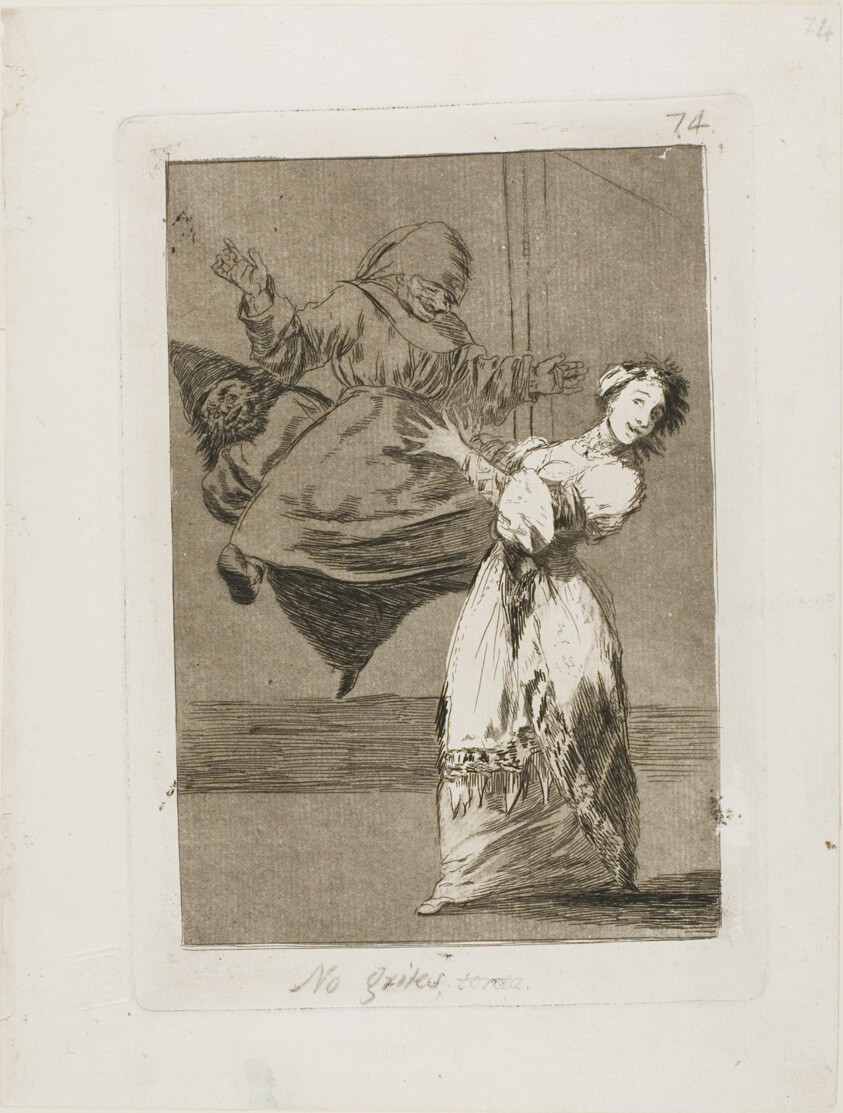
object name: Print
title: Don't scream, stupid, plate 74 from Los Caprichos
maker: Francisco José de Goya y Lucientes (Spanish, 1746-1828)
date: 1797/99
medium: Etching and burnished aquatint on white laid paper with title and number in crayon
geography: Spain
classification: etching; print; prints and drawing